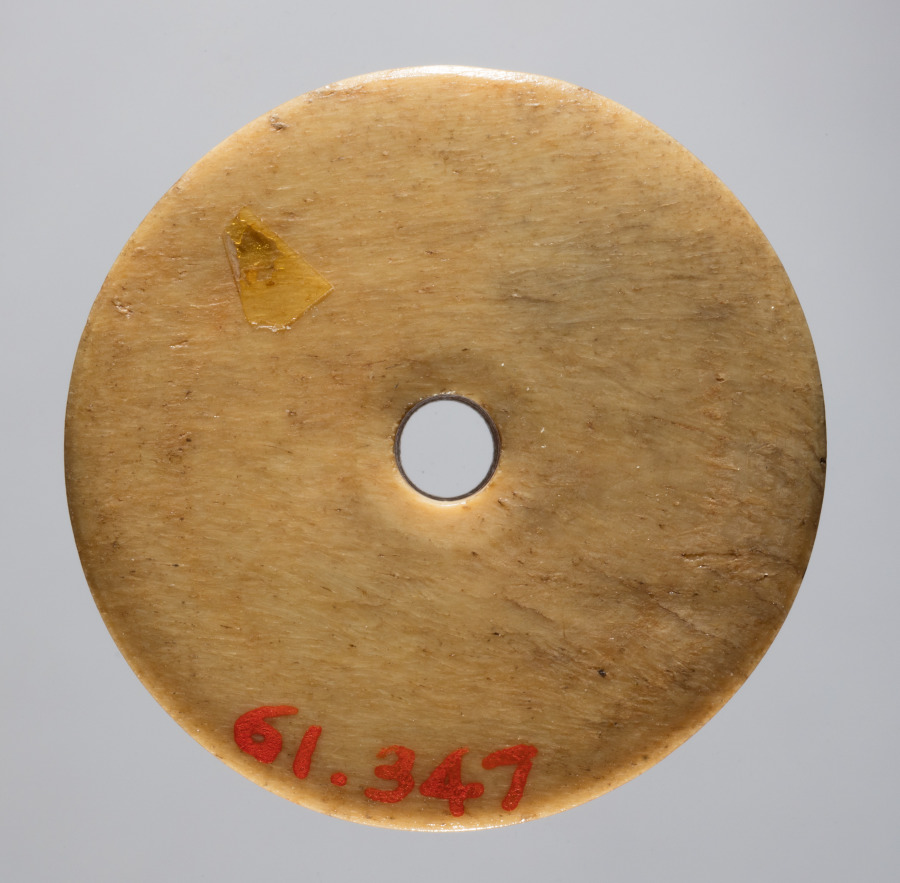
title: Spindle Whorl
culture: Iran, early Islamic period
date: 700s - 900s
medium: bone, incised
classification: Spindle Whorl